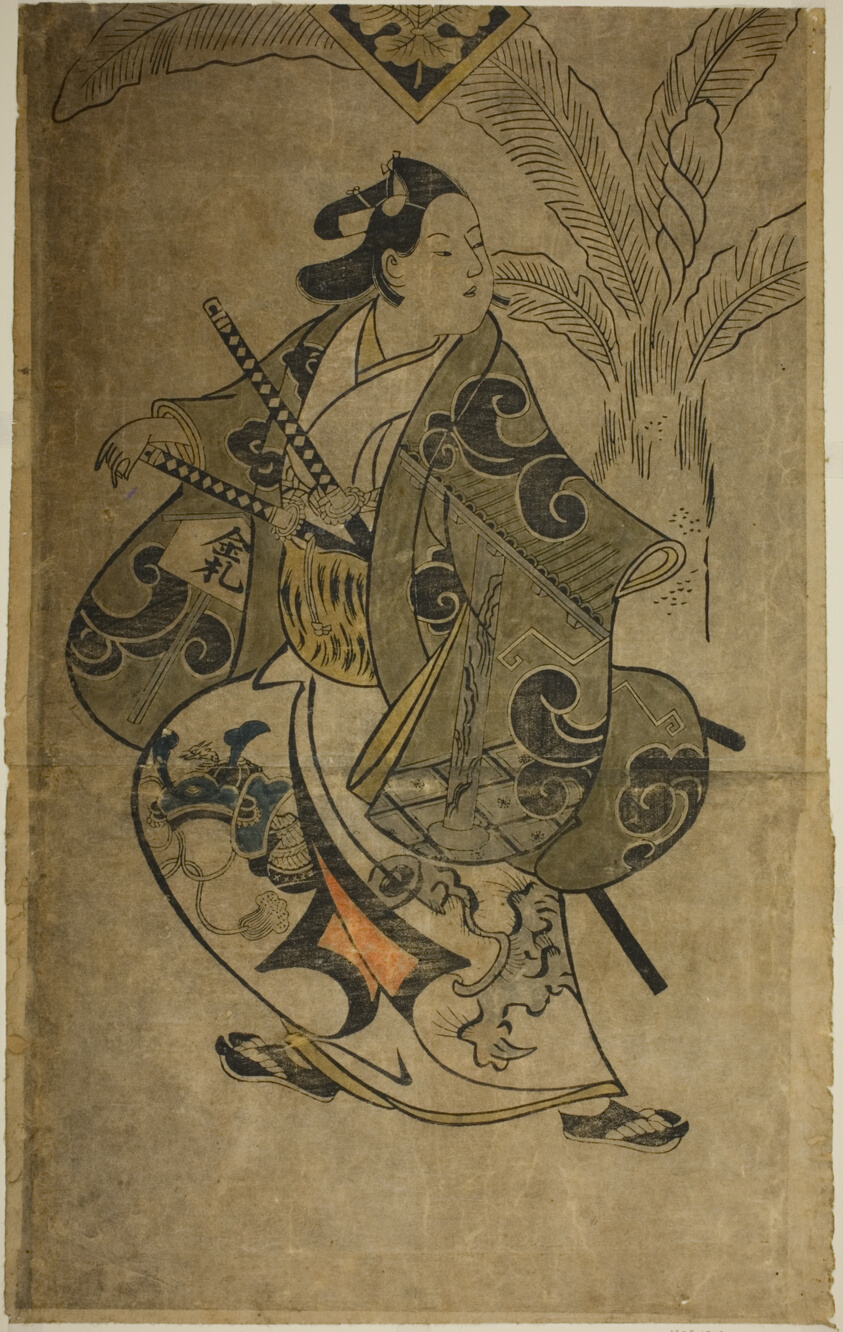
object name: Print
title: The Actor Shinomiya Heihachi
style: Japanese (culture or style)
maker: Attributed to Torii Kiyonobu I; Japanese, 1664-1729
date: c. 1700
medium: Hand-colored woodblock print; o-oban, tan-e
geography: Japan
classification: woodblock print; print; asian art